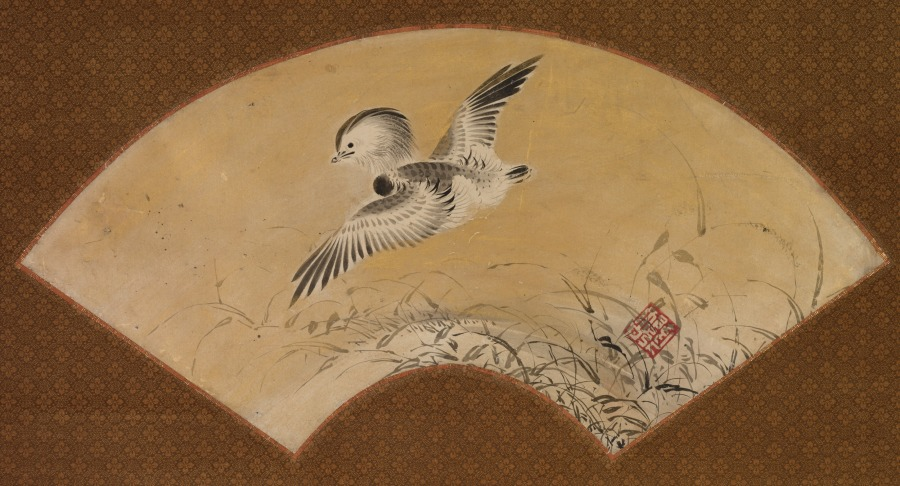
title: Duck in Flight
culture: Japan, Muromachi period (1392–1573)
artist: Shikibu Terutada (Japanese, active mid-1500s)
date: mid-1500s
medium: fan painting mounted as hanging scroll; ink and gold on paper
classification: Painting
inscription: artist's seal in lower right.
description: These three fan-shaped paintings, now mounted as individual hanging scrolls, were once part of a set of 20 mounted on a folding screen. They portray the Chinese subjects, from left to right, of the scholar-official Pan Lang, Hanshan reciting his poetry to Shide, and a duck in flight above reeds. Pan Lang grew so fond of the mountain in his place of exile that when he was ordered back to the capital, he rode backward on his donkey so he could see it until it receded into the distance. Hanshan and Shide worked in the kitchen of a Zen monastery, but were actually reincarnations of the bodhisattvas Manjushri and Samantabhadra. The combination of a mandarin duck and reeds may have signified a level of attainment in Chinese civil service exams. All three paintings bear the seal of the Kantobased artist Shikibu Terutada. Shikibu was familiar with Kano school painting, but he also modeled his early style after that of the prominent Kanto-based Kenkō Shōkei (active about 1470–after 1523).